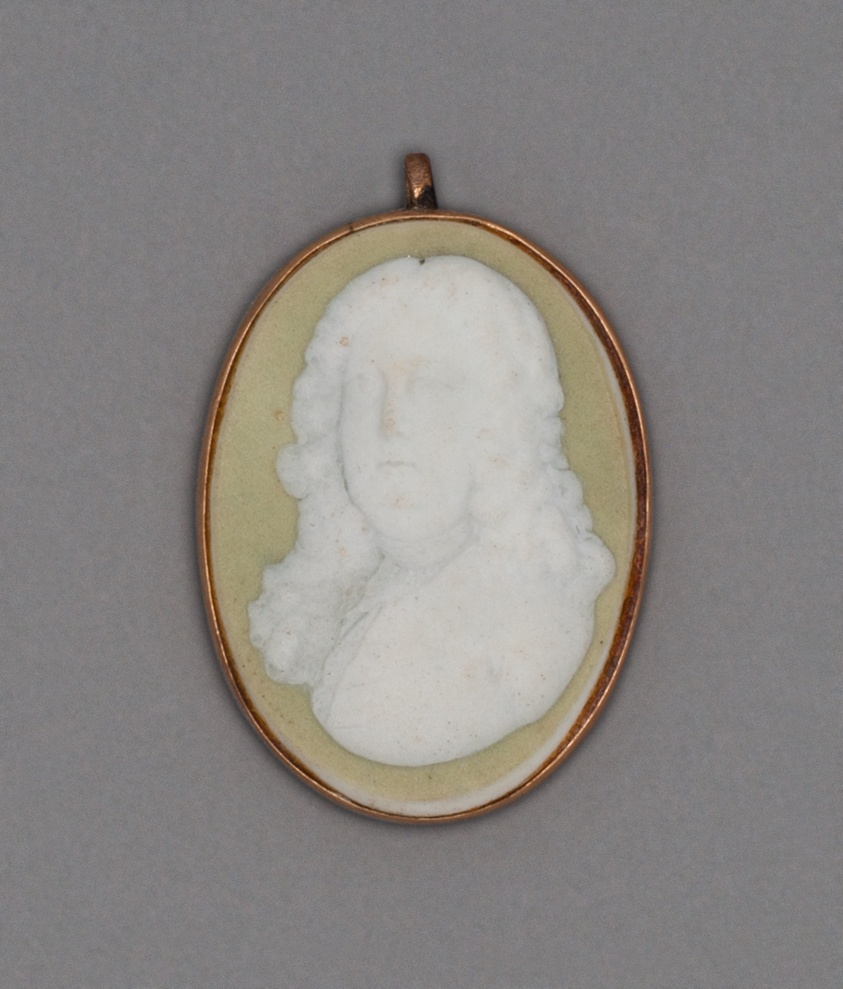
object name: Ceramics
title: Cameo with Portrait of Duke of Marlborough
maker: Wedgwood Manufactory (England, founded 1759)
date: Late 18th century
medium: Stoneware (jasperware)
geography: Burslem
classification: cameo (sculpture); sculpture; stoneware; european decorative arts; ceramics